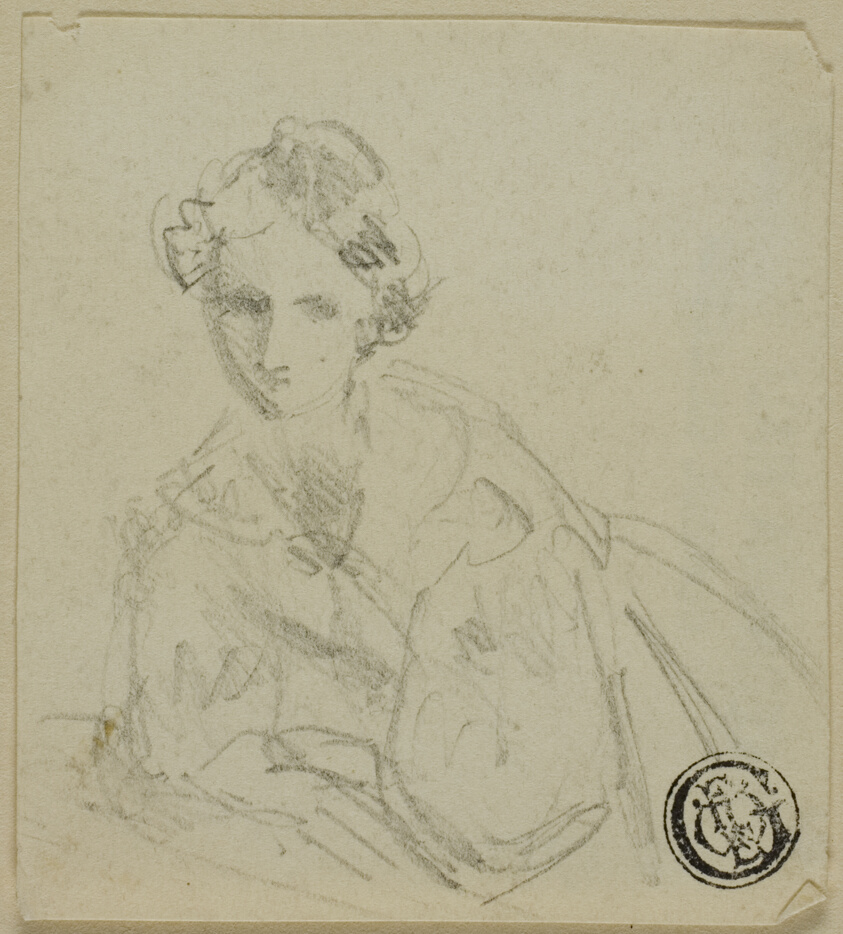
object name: Drawing and Watercolor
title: Half-Length Sketch of Woman in Evening Dress Leaning on Balustrade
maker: Unknown Artist; European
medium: Graphite on cream wove paper, tipped onto cream wove paper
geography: England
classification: graphite; drawings (visual works); prints and drawing